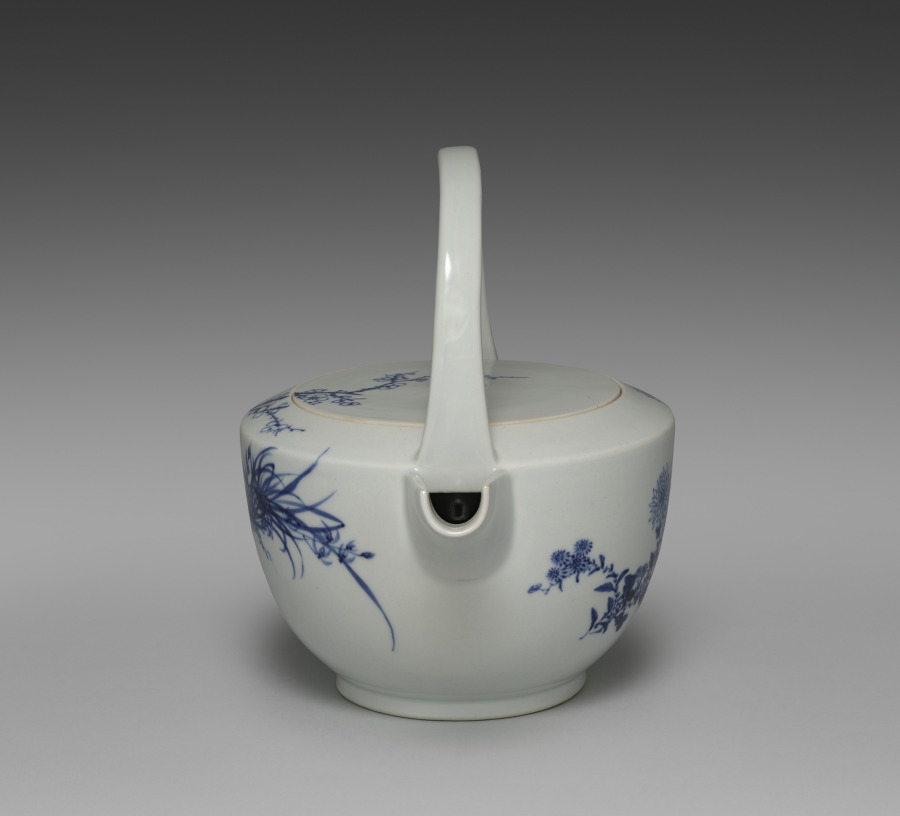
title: Sake Pourer with Chrysanthemum, Orchid, and Plum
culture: Japan, Meiji period (1868–1912)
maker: Seifū Yohei III (Japanese, 1851–1914)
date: c. 1887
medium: Porcelain with underglaze blue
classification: Ceramic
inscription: Artist's signature in underglaze blue on the base.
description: Seifū Yohei II and his successor, Seifū Yohei III, trained in ink painting. Their brush skills are seen in their underglaze cobalt blue designs. Orchid, bamboo, chrysanthemum, and plum, appearing on Yohei III’s sake pourer, are known as the Four Gentlemen. They symbolize the virtues of humility, integrity, endurance, and perseverance.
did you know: This sake pourer is decorated with the Chinese theme of the Four Nobles, in which the qualities of a good person are represented by plant.